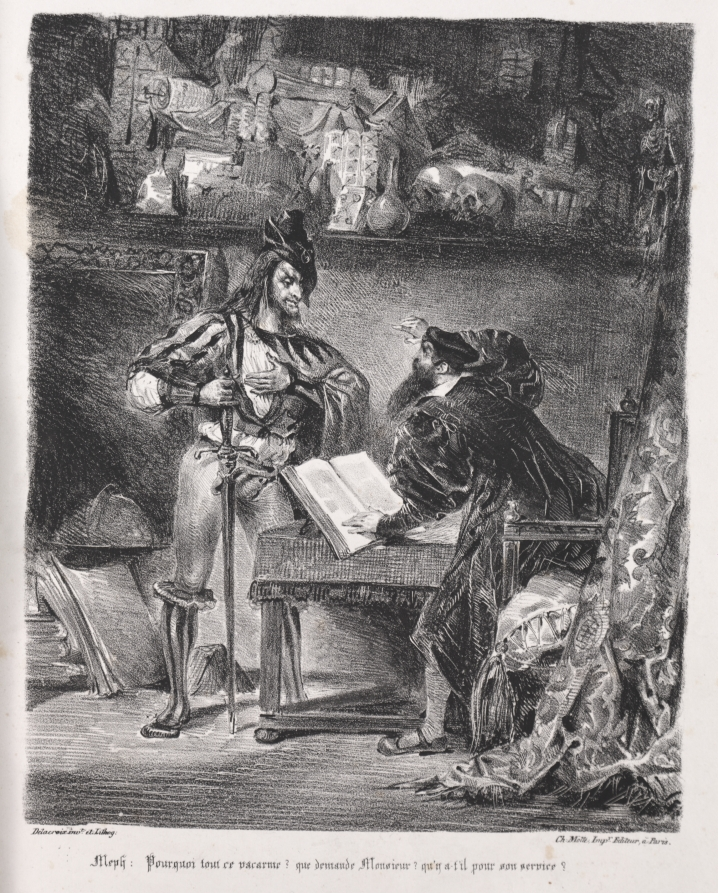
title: Illustrations for Faust: Méphistophélés visits Faust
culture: France, 19th century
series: Faust: Tragédie de M. de Goethe, translated into French by Albert Stapfer.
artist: Eugène Delacroix (French, 1798–1863)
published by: Chez Ch. Motte, Éditeur, distributed by Chez Sautelet, Libraire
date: 1828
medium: lithograph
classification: Print